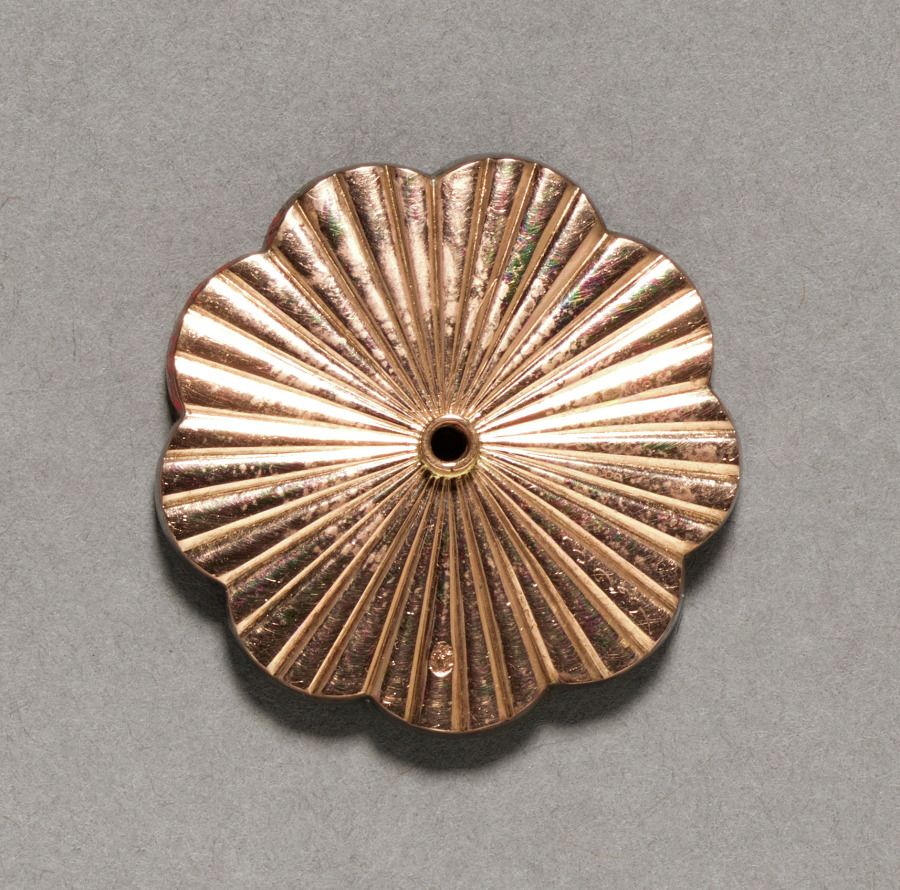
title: Button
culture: Russia, St. Petersburg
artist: firm of Peter Carl Fabergé (Russian, 1846–1920)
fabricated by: August Wilhelm Holmström (Russian, 1929–1903)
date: after 1896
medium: gold, enamel, diamonds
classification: Miscellaneous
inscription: double-headed eagle; Fabergé; St. Petersburg, Moscow (all in Cyrillic; inside lid of box).